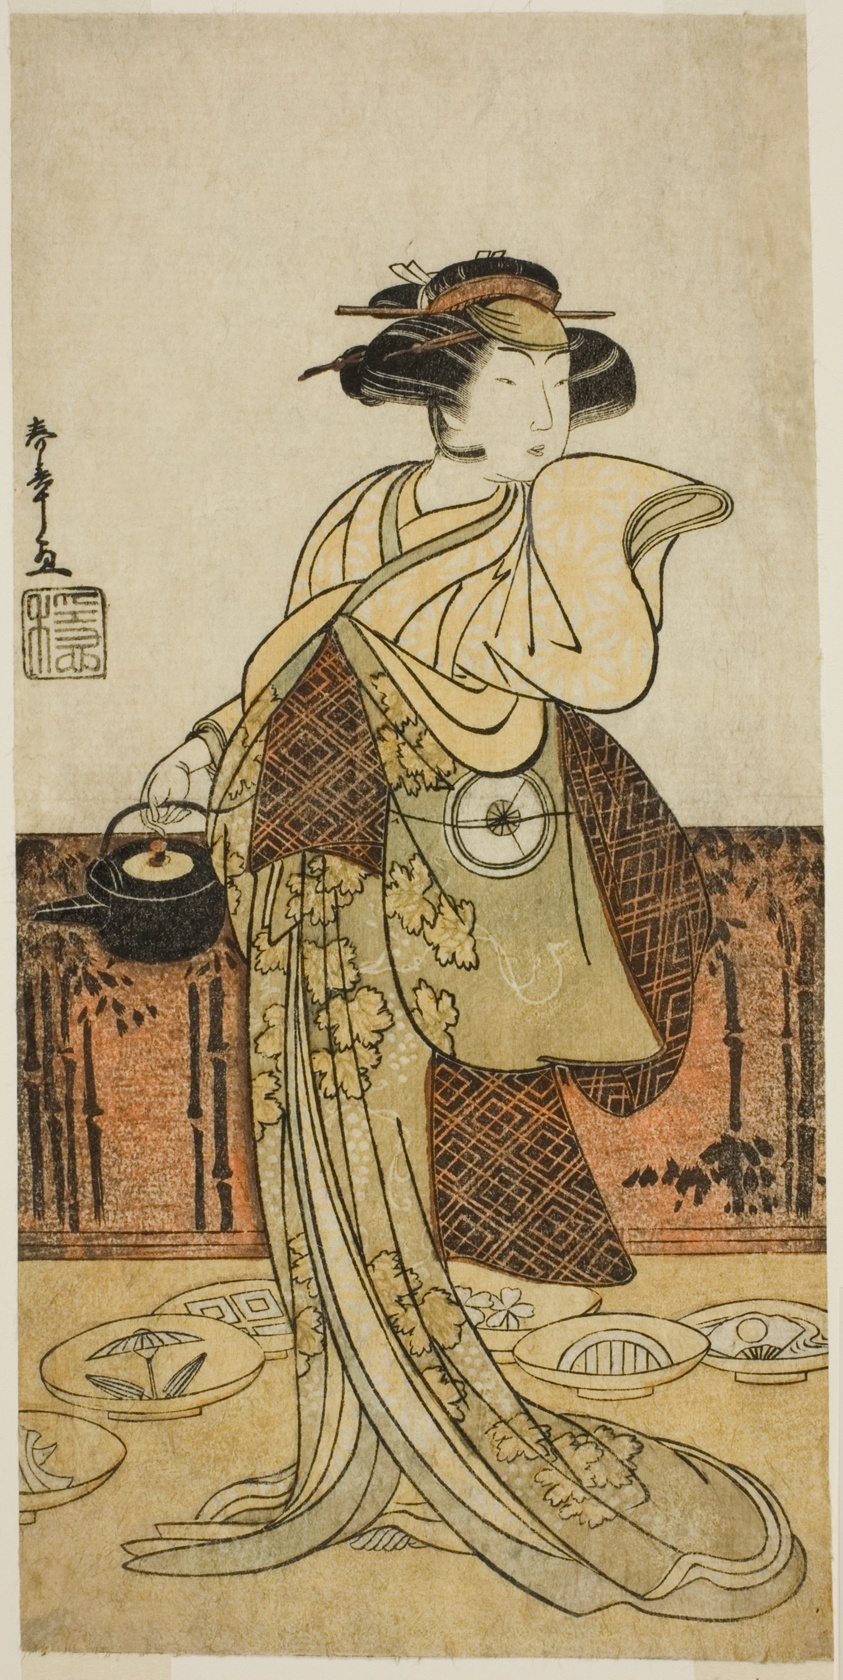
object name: Print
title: The Actor Iwai Hanshiro IV as Tsukisayo in the Play Gohiiki Nenne Soga, Performed at the Nakamura Theater in the First Month, 1779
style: Japanese (culture or style)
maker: Katsukawa Shunsho 勝川 春章; Japanese, 1726-1792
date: c. 1779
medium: Color woodblock print; hosoban; left sheet of diptych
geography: Japan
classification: woodblock print; print; asian art